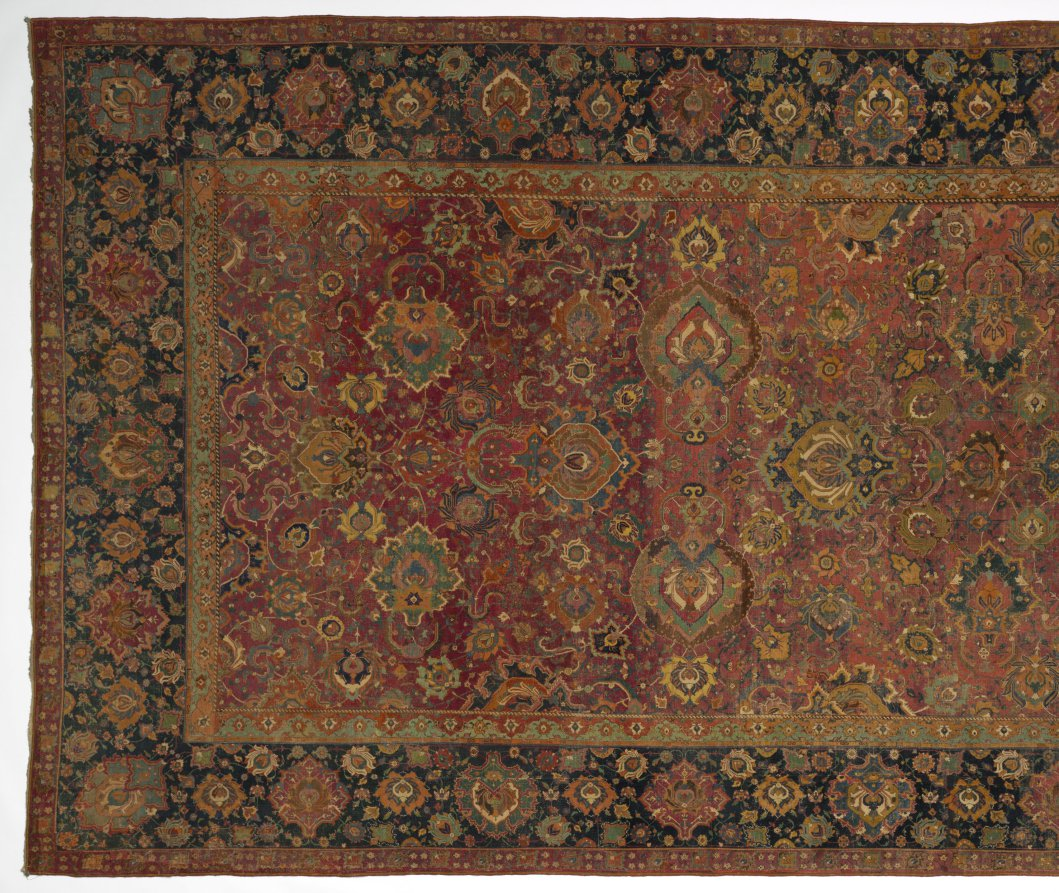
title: Carpet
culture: Iran, Herat, 16th century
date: 1500s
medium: senna knot: wool and cotton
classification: Carpet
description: The Mughals, with their nomadic Central Asian roots, were constantly on the move. They were adept at transporting the trappings of their residences and bases of operation from place to place. Fine carpets and canopies demarcated places of importance, and could be rolled up and moved when the ruler was ready to consolidate his power at a new location. When they settled in stone palaces in India, the interiors were covered with carpets, lending a warmth to the spaces that cannot be felt at the sites today. This carpet is of the type that the Mughals would have acquired for their residences. Mughal paintings are filled with depictions of carpets and textiles, many ornamented, like this one, with delicate and complex palmette-dominated arabesque patterns that evoke a paradisiacal setting.